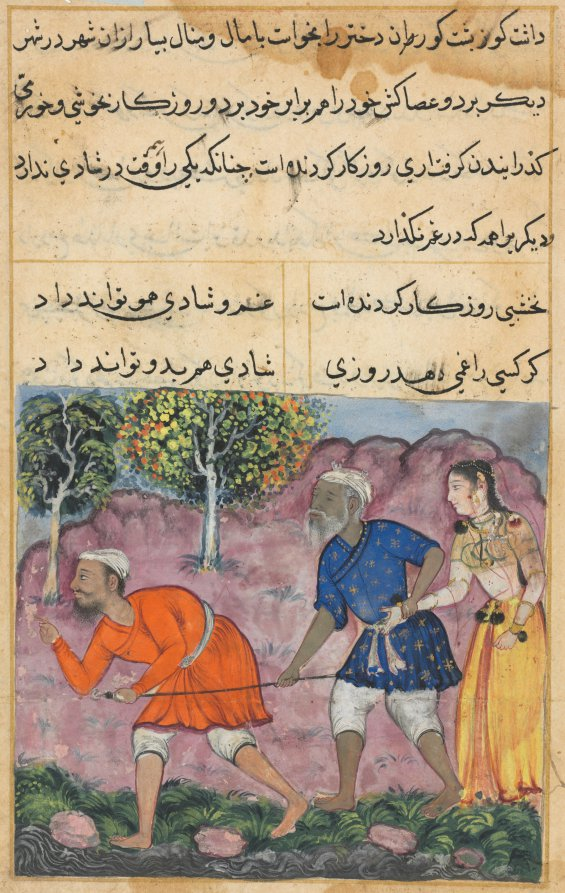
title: The Raja’s daughter, born with three breasts, accompanies her blind husband and his hunchback guide on a journey, from a Tuti-nama (Tales of a Parrot): Forty-second Night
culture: Mughal India, court of Akbar (reigned 1556–1605)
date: c. 1560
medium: gum tempera, ink, and gold on paper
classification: Painting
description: The blind man clutches tightly to the hunchback’s staff with one hand and his wife’s arm with the other. At the front of the group, the hunchback points ahead to their ultimate destination—a city far from where the raja’s daughter was born. This image represents a story within the story that is being told by a parrot to the merchant’s son ‘Ubaid in order to cure his infatuation with his wife.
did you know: The woman was forced to leave home after soothsayers predicted that she would someday harm her father.